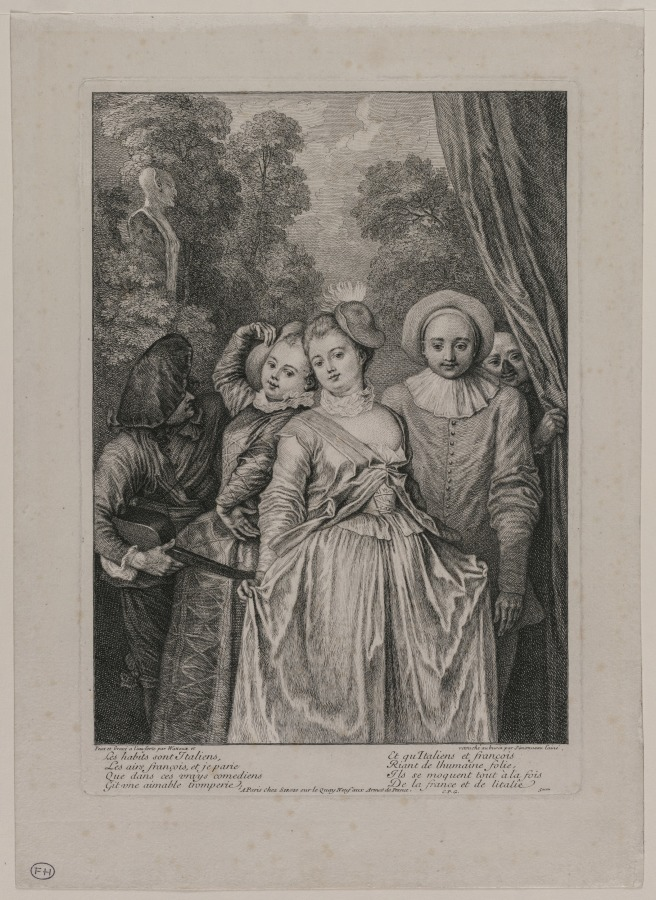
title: The Clothes are Italian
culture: France, 18th century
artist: Jean-Antoine Watteau (French, 1684–1721)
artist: and Charles Simonneau (French, 1645–1728)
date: 1715–16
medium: etching and engraving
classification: Print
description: Actors dressed as stock characters from the Italian commedia dell’arte and the French popular theater take their final bow in this print. Known for their comic plots and improvisational satire, the Italian players were banned in France from 1697 until 1716 after one of their productions was thought to criticize King Louis XIV’s mistress. Still in demand with French audiences, some of the characters and stories were adapted into the less regulated performances. Before the print’s publication, Jean-Antoine Watteau’s etched composition was finished by professional engraver Charles Simonneau. While Simonneau’s precise dots and crosshatched lines clarify the details of the print, the spontaneity and freedom of Watteau’s etched lines better express the sense of whimsy and play that characterizes the subject matter.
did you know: Jean-Antoine Watteau’s compositions often reference theater and music.